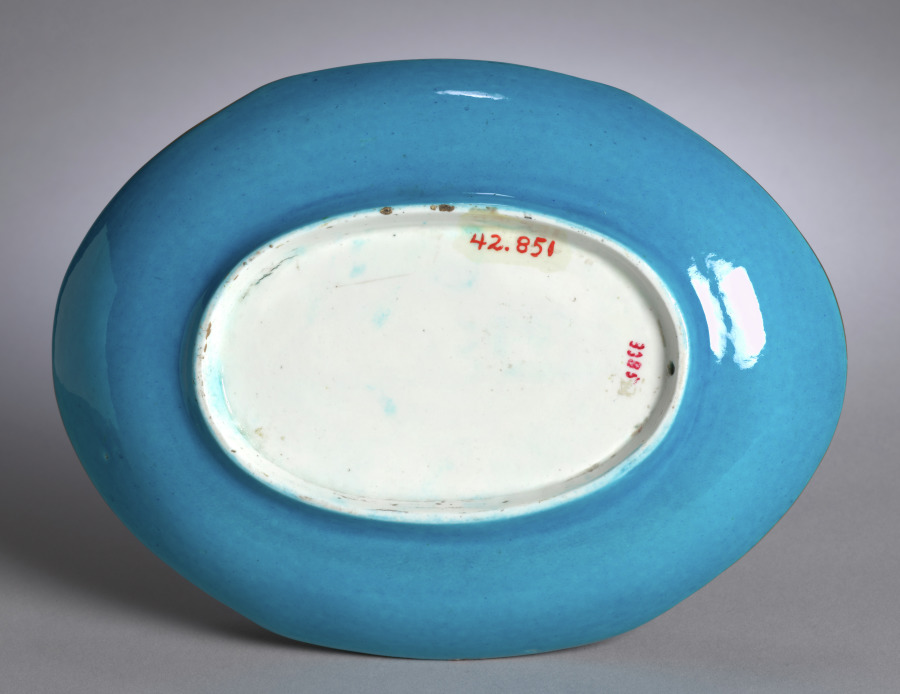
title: Dish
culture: France, Sèvres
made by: Sèvres Porcelain Factory (French, est. 1756)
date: 1800s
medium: porcelain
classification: Ceramic